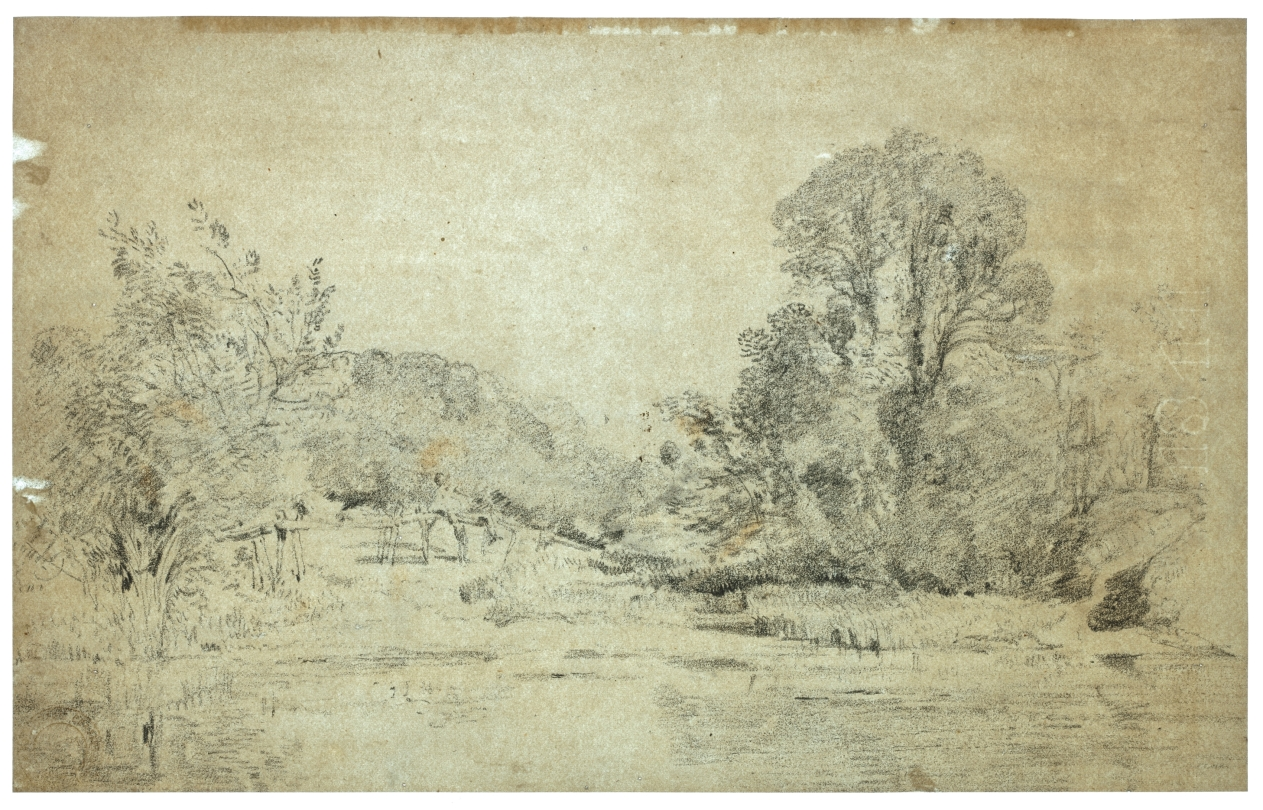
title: Landscape with Trees Surrounding a Pond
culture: England, 19th century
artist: John Constable (British, 1776–1837)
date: c. 1800–37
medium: graphite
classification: Drawing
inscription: Watermark: 1811